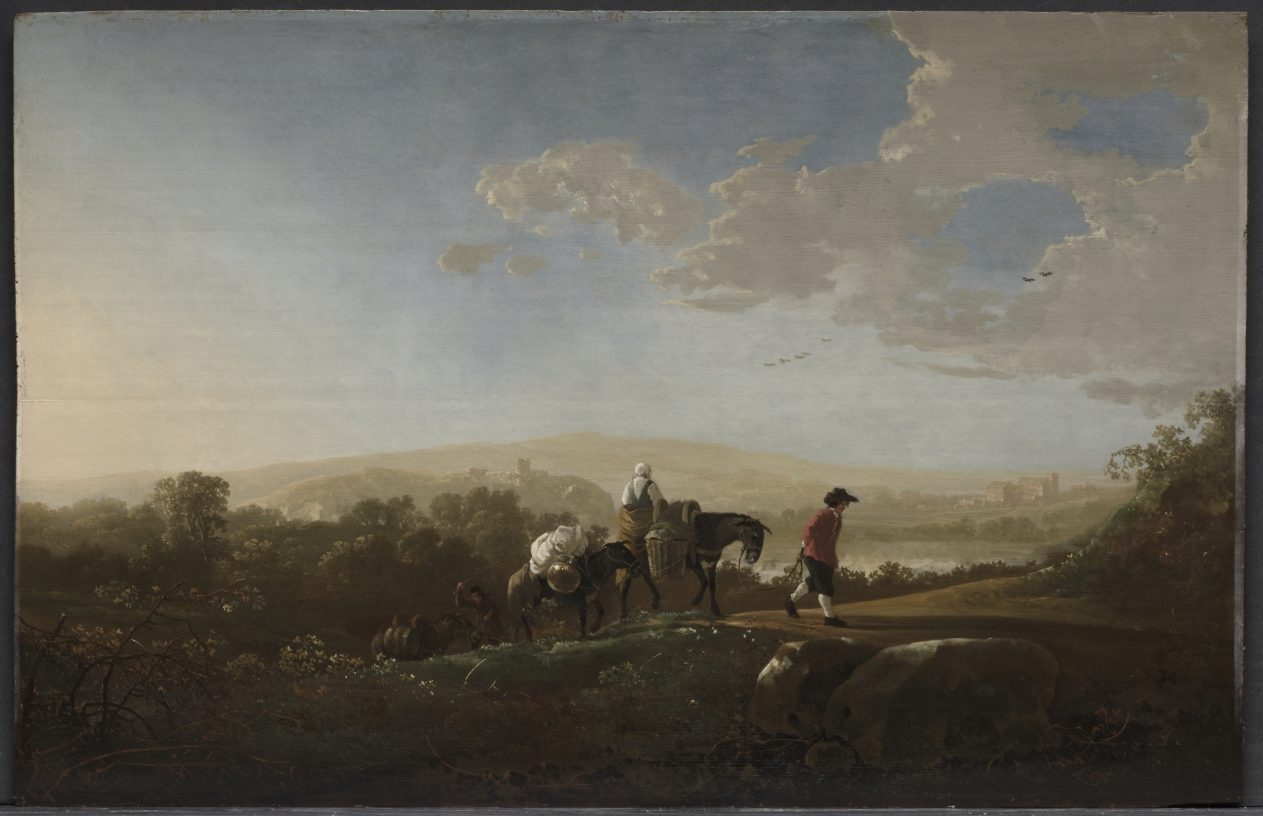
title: Travelers in Hilly Countryside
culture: Netherlands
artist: Aelbert Cuyp (Dutch, 1620–1691)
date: c. 1650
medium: oil on wood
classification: Painting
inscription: Signed lower right: "A cuyp"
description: While many Dutch painters focused on depicting the local countryside, others were inspired by the hilly topography, golden sunlight, and picturesque monuments of Italy. Although Aelbert Cuyp never visited Italy, this serene and beautifully preserved panel demonstrates his skill in evoking the idyllic qualities of a distant land.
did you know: Small dabs of white paint suggest the reflective shimmer of the sun on the landscape.